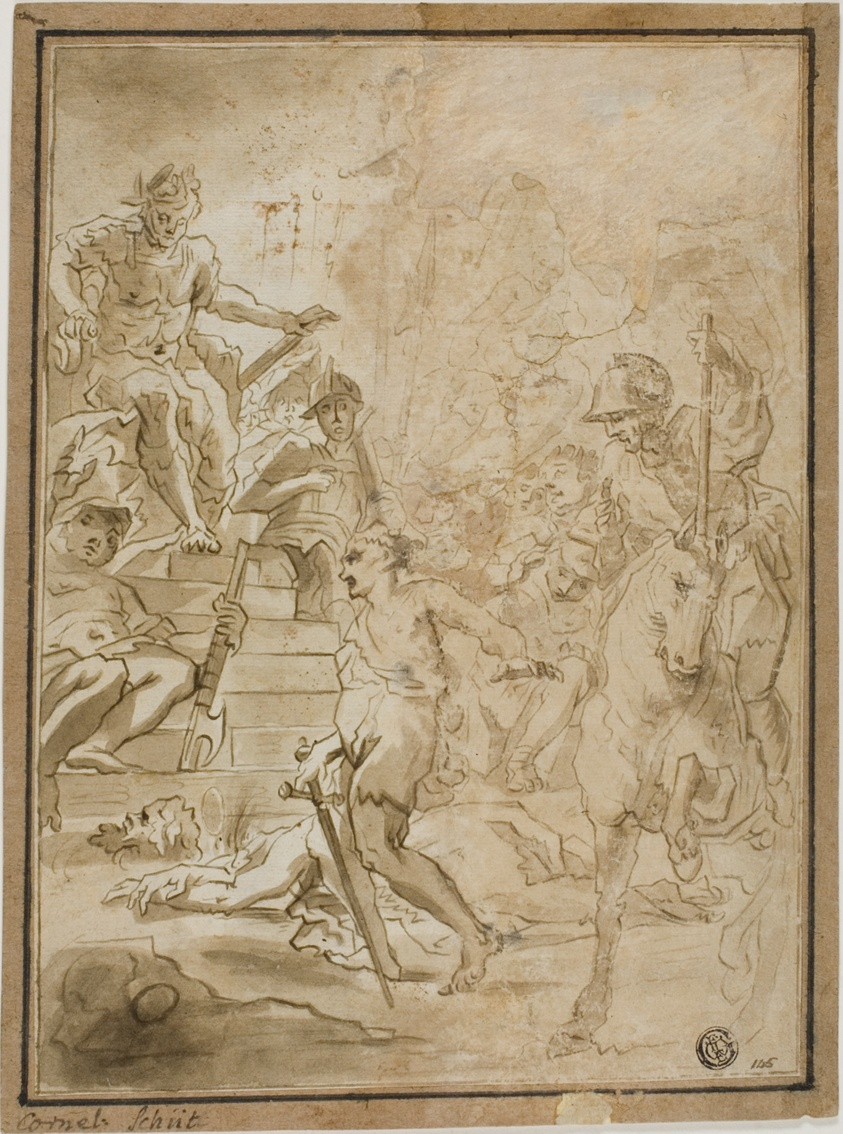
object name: Drawing and Watercolor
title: Beheading of Male Saint in Presence of Roman Ruler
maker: Attributed to Cornelis Schut, I; Flemish, 1597-1655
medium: Pen and brown ink, with brush and brown wash, on cream laid paper, laid down on ivory laid paper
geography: Flanders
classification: pen and ink drawings; drawings (visual works); prints and drawing